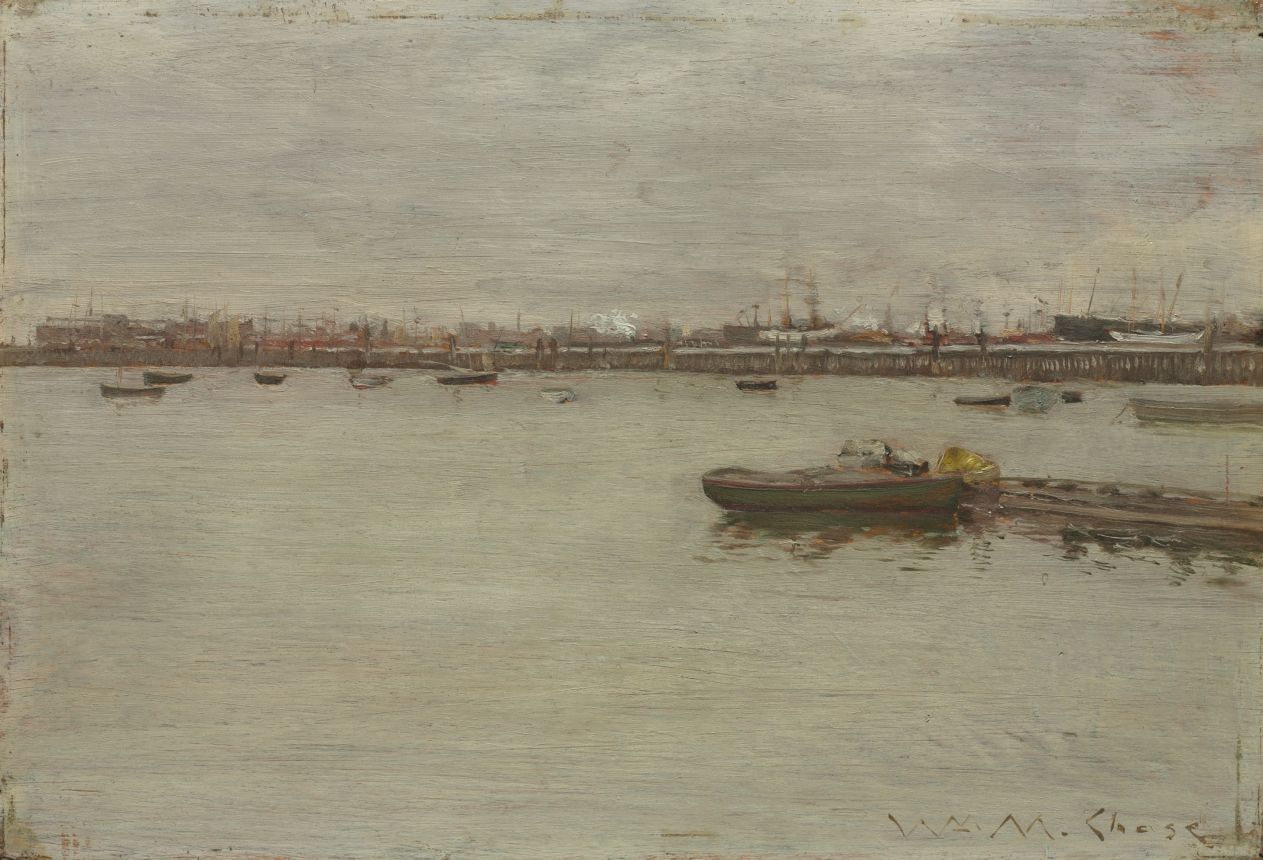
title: Gray Day on the Bay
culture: America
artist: William Merritt Chase (American, 1849–1916)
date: c. 1886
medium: oil on wood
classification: Painting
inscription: signed lower right: WM M. Chase [WM in monogram]